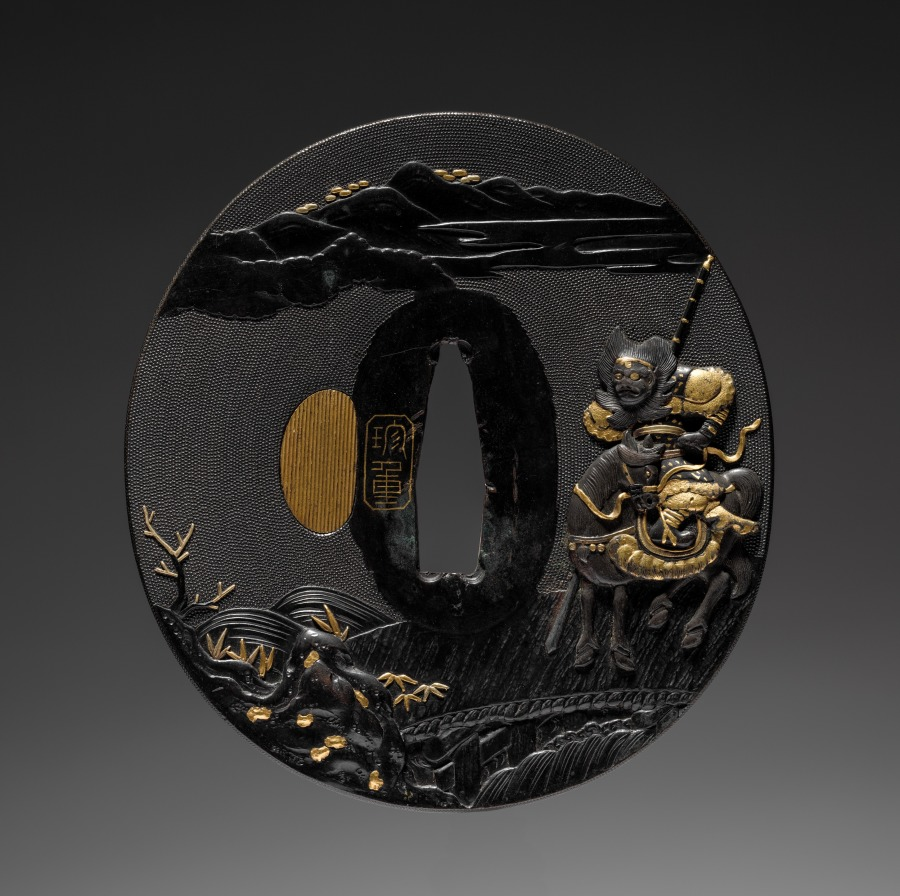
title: Sword Guard (Tsuba)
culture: Japan, Edo period (1615–1868)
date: mid-1800s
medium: bronze and gold foil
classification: Arms and Armor